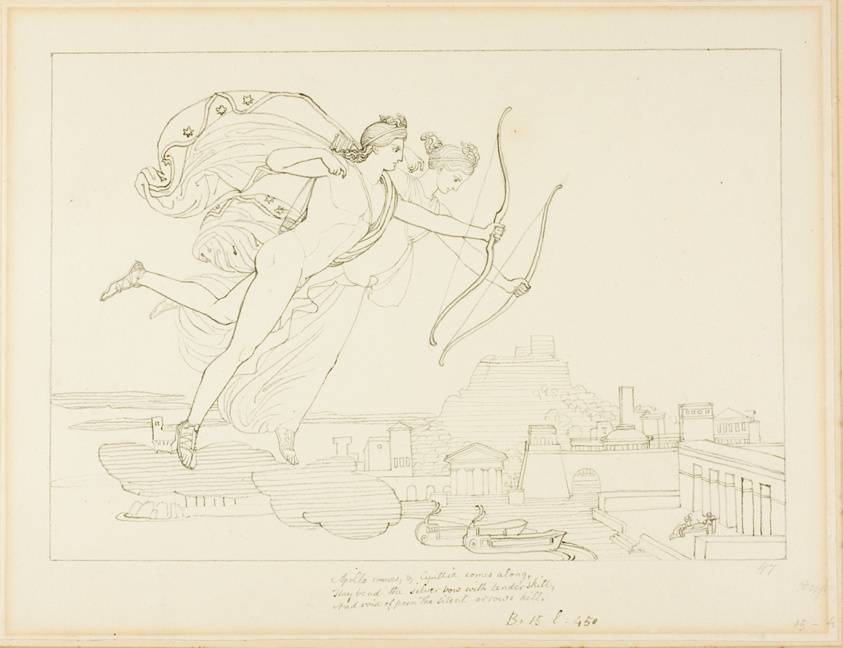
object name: Drawing and Watercolor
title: Apollo and Diana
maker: John Flaxman, II; English, 1755-1826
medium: Pen and black ink, over traces of graphite, on ivory wove paper, laid down on tan wove paper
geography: England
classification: pen and ink drawings; drawings (visual works); prints and drawing